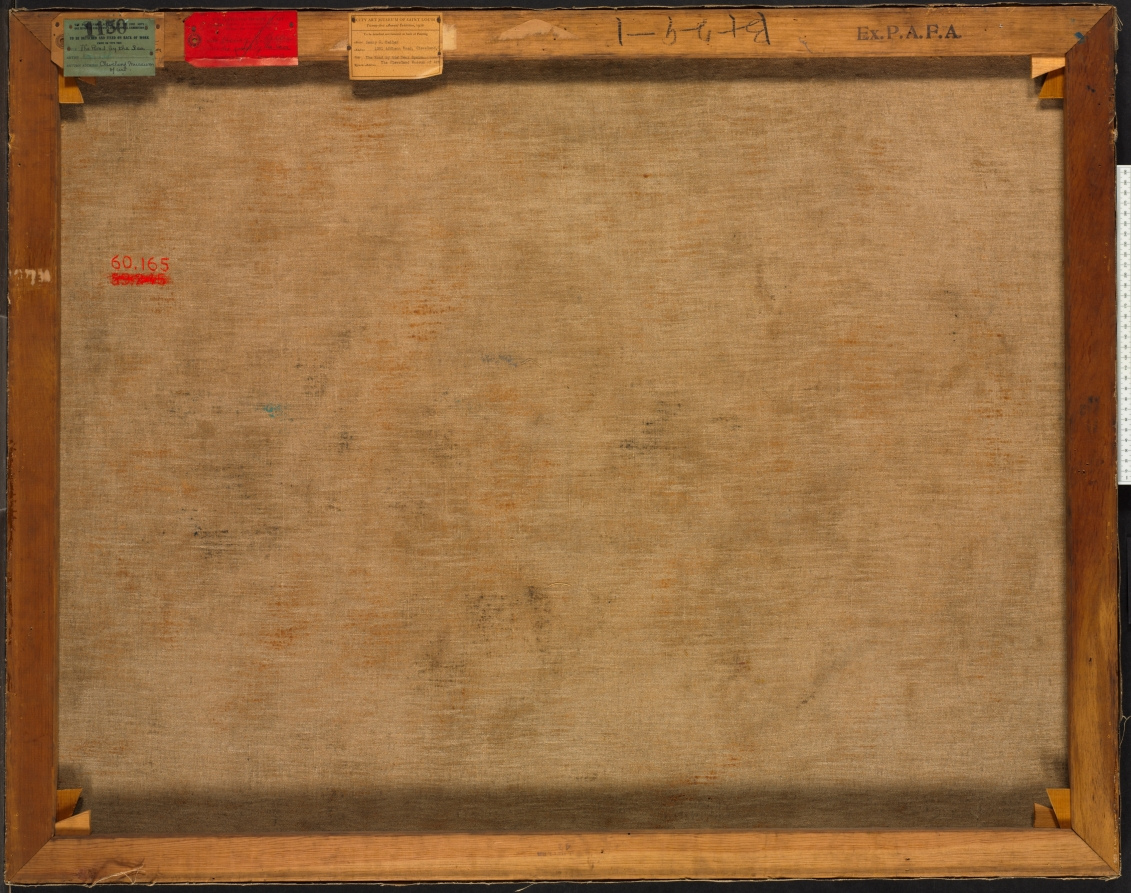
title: The Road to the Sea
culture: America, Ohio, Cleveland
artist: Henry Keller (American, born Germany, 1869–1949)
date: 1923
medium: oil on canvas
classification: Painting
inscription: signed lower left: Keller